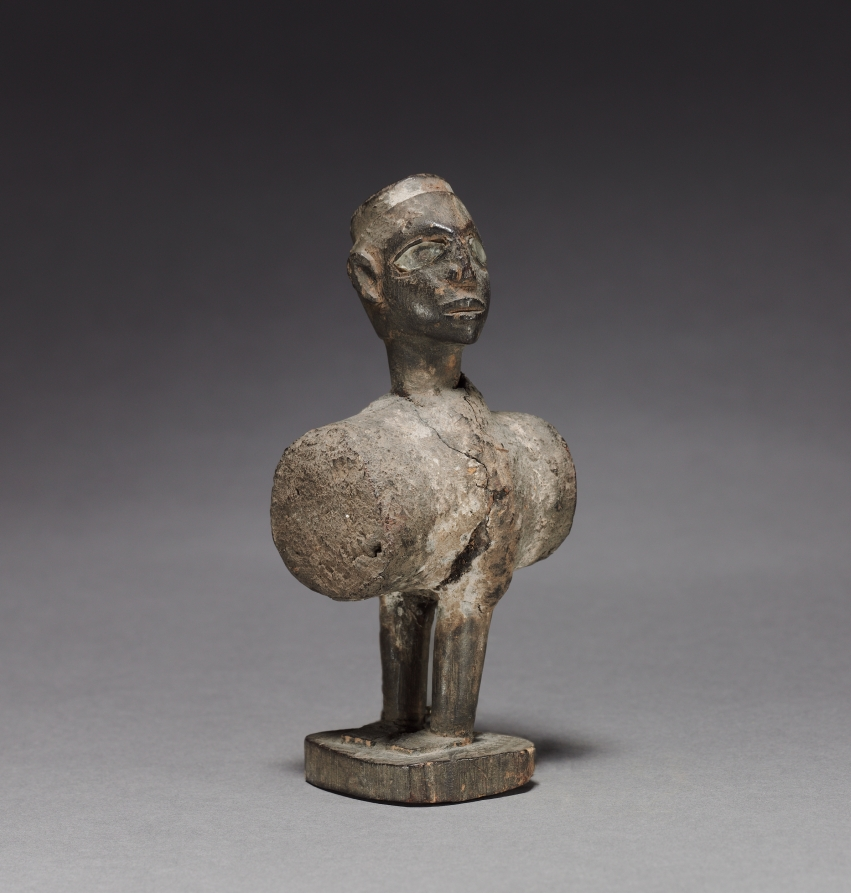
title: Power figure (nkisi)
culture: Africa, Central Africa, Republic of the Congo, Kongo-style maker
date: late 1800s-early 1900s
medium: Wood, organic materials (including resin), and metalized glass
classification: Sculpture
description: One of seven anthropomorphic figurines, these minkisi contained medicines in which an ancestral spirit was believed to reside. The medicines served a metaphorical rather than literal purpose in the resolution of conflicts among Kongo people. This figure contained white- and red-colored medicine loads on its belly and back. Its pose may refer to the nkisi’s capacity to see more than others.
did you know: The nduda minkisi were loaded with gunpowder and/or medicine to protect their owners and to shoot “witches” and other enemies.